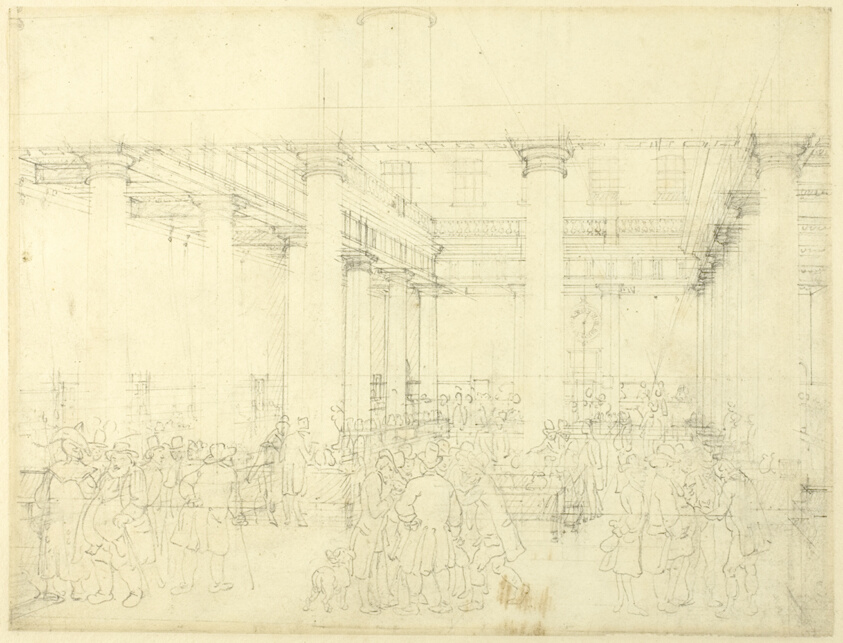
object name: Drawing and Watercolor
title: Study for Corn Exchange, Mark Lane, from Microcosm of London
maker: Augustus Charles Pugin (English, born France, 1762-1832); Thomas Rowlandson (English, 1756-1827)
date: c. 1808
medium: Graphite on cream wove paper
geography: England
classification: graphite; drawings (visual works); prints and drawing